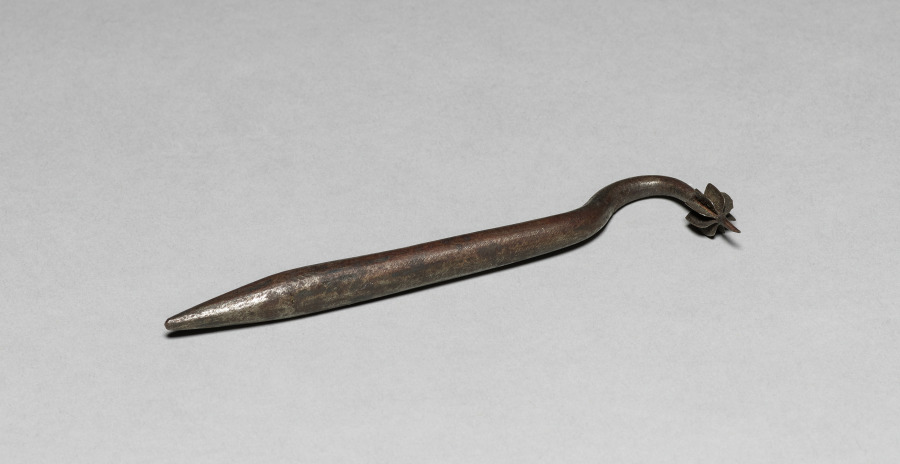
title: Straw Splitting Tool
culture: England, early 19th century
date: early 19th century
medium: iron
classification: Tool